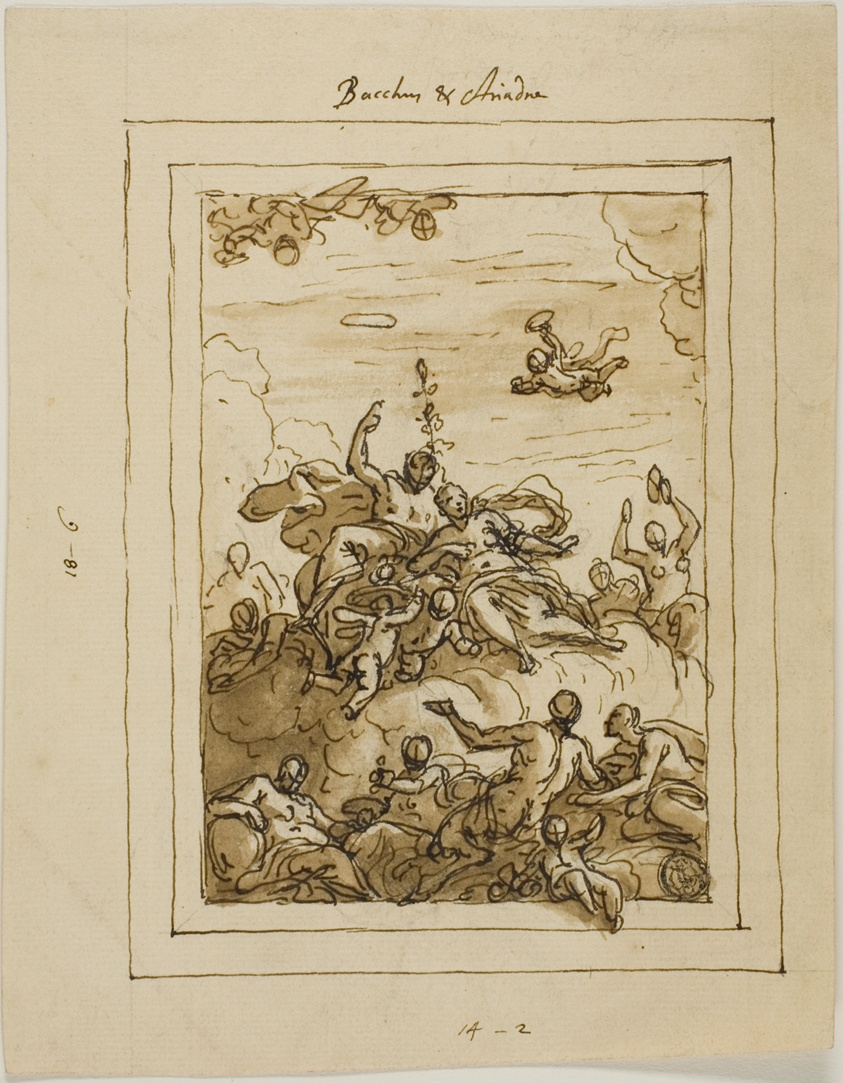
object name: Drawing and Watercolor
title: Bacchus and Ariadne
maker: James Thornhill (English, 1675-1734)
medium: Pen and brown ink with brush and brown wash, over graphite, on cream laid paper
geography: England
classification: pen and ink drawings; drawings (visual works); prints and drawing